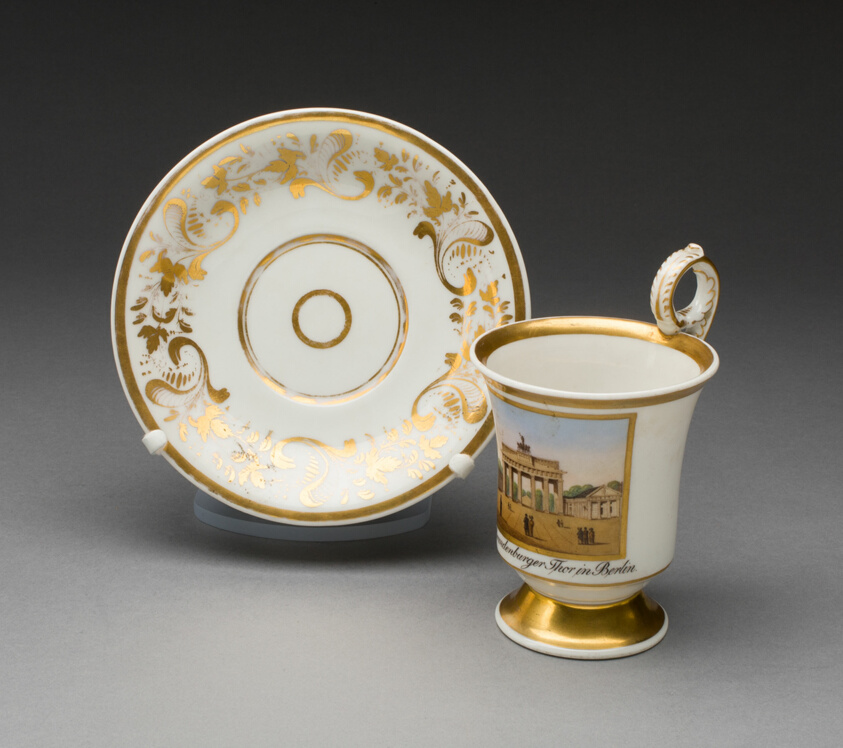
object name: Ceramics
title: Cup and Saucer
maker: Berlin Porcelain Manufactory (Königliche Porzellan-Manufaktur im Berlin); Germany, 1763-1918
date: 1844/47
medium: Hard-paste porcelain, polychrome enamels, and gilding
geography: Berlin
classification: drinking vessel; porcelain; ceramics; european decorative arts